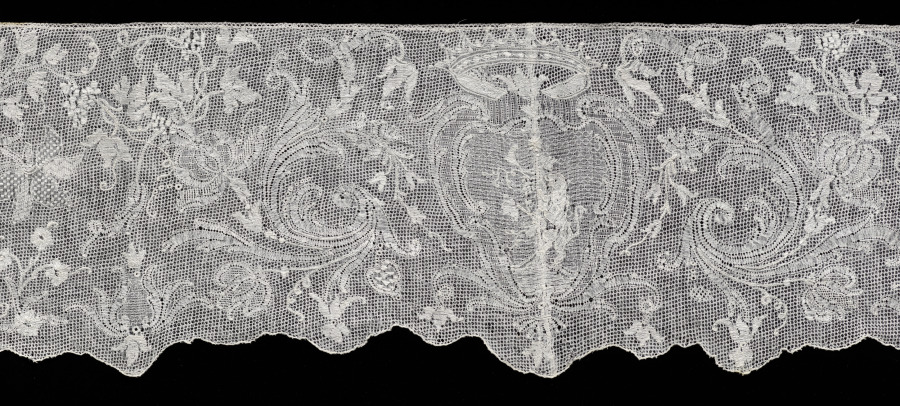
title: Lace Flounce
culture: Belgium, Dinant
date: 1700s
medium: Linen: needle lace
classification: Lace